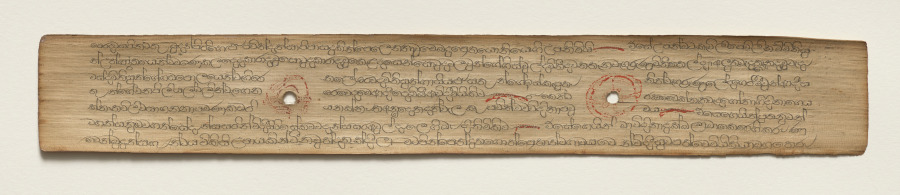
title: Leaf from a Buddhist Manuscript (verso)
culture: Sri Lanka, Singhalese, Late 17th century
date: c. 1700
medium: fiber paper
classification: Manuscript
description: Palm leaf material is still used for manuscripts in Sri Lanka. The palm leaves are prepared first by boiling them, drying them in the sun, and then rubbing them with oils. Scribes then use a metal stylus to incise the text. Then charcoal powder is wiped across the pages, filling in only the inscribed lines.